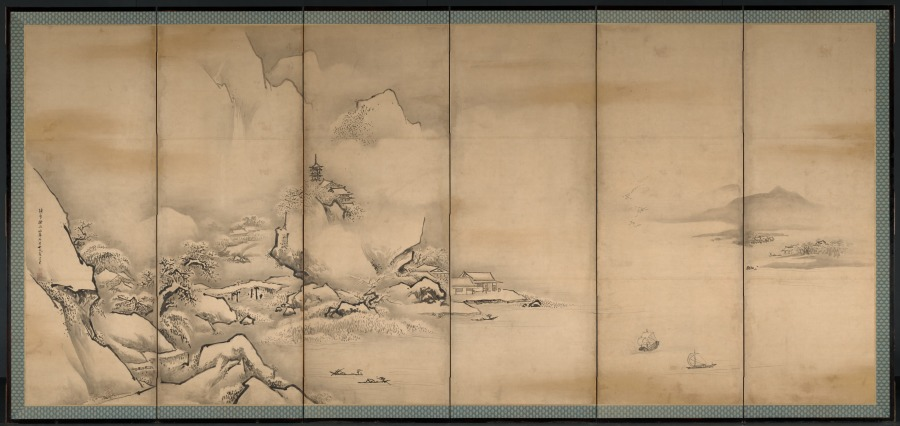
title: The Four Seasons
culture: Japan, Edo period (1615–1868)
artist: Kano Tan’yū (Japanese, 1602–1674)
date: 1668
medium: Six-panel folding screen, ink and slight color on paper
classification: Painting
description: Tan'yū's skills were honed early within the regimen of the Kano family's painting studio. His grandfather, Eitoku (1543–1590) was the Momoyama period's most sought-after painter, a champion of colorful, large-scale painting compositions who worked for several of the country's most powerful leaders. When the young Tan'yū was summoned to Edo in 1617 by the shogun to become a member of the new capital's official painting studio, few opportunities to work on similarly ambitious projects existed. Yet by the end of his career, Tan'yū had supervised the execution and installation of linked mural painting compositions in several of Japan's most prestigious residences and castles. As an official court painter to the first shogun, Tokugawa Ieyasu (reigned 1603–5), and then his successors, Tan'yū appears to have successfully juggled his official duties with private activities as a teacher, as the era's leading connoisseur of classic Chinese and Japanese painting, and as a practicing artist. His surviving compositions as well as thousands of sketches far surpass the oeuvre of any of his contemporaries. While studio assistants surely contributed to his oeuvre, just as later imitators consciously confused his accomplishments, a clearer image of the painter has emerged in recent years that better conforms with his contemporary acclaim as recorded in seventeenth- and eighteenth-century documents. Tan'yū can now be seen as an artist adept in virtually all traditional ink painting subject matter, which he often presented in novel interpretations. Equally important are his rare screen (byōbu) compositions executed in a pure yamato-e manner with vivid mineral pigments on a gold-foil background. This pair of byōbu presents Tan'yū's more orthodox approach to academic ink painting methods embracing Chinese themes that had been interpreted by numerous Japanese ink painters over the centuries. Thus a typical view of residences and human activities set along the shores of an impressive river (or lake) is enlivened by the Japanese proclivity for including seasonal references. Proceeding from right to left, the viewer passes sequentially from spring to the snow-laden branches of winter. Tan'yū lends considerable atmospherics to the panorama in his use of misty cloud banks, frequently set off by sharp, darkened ink lines or whole areas of ink washes of variegated tonalities. The spring and summer views are particularly notable in this regard, as is the presence of the artist's signature on both byōbu, attesting to their completion in Tan'yū's sixty-seventh year (1668)—50 years after he left Kyoto for the capital, and 30 years following his adoption of the artist name "Tan'yū" (in 1635). From 1622, when he began work on the mural paintings for Edo castle (the shogun's formal residence), through the completion of the painting cycle in 1636 for the Tokugawa family mausoleum in Nikkō to the north of Edo, Tan'yū's skills as head of an accomplished painting studio as well as a master painter found their most impressive expression in large-scale compositions. In 1638 he received the honorary Buddhist title Hōgen (Eye of the Law). It is intriguing therefore that relatively few independent byøbu paintings from the master's hand survive, particularly documented early works.